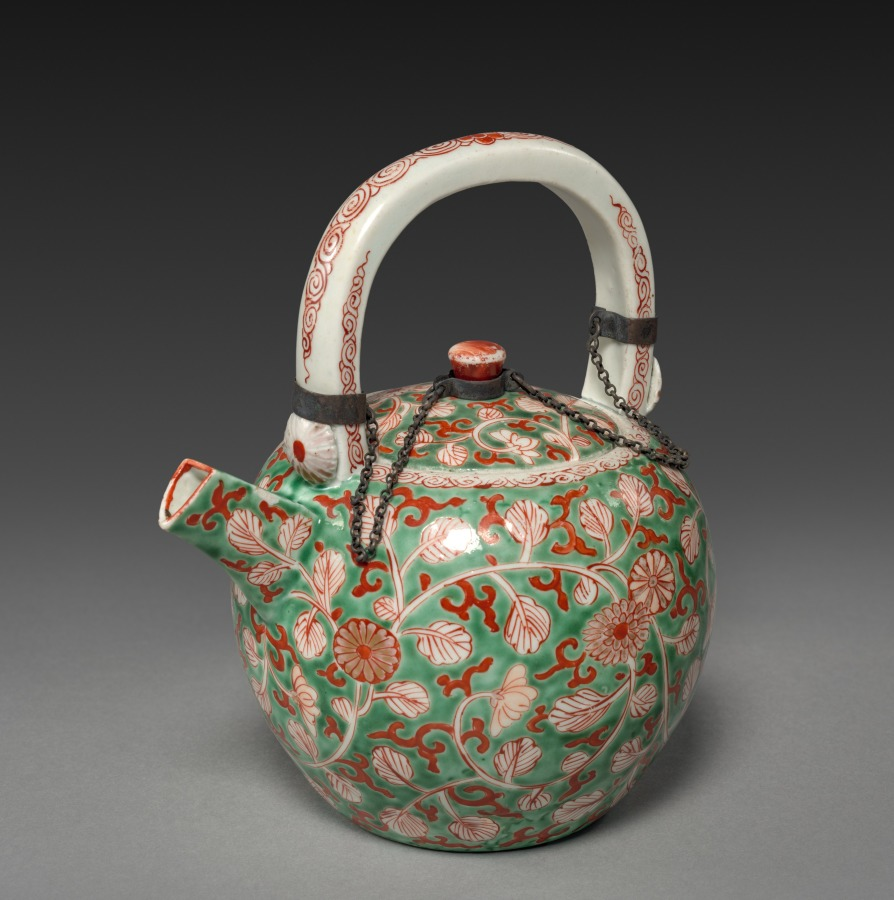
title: Wine Pot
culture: Japan, Edo period (1615–1868)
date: 1615–1868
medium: porcelain with colored enamel decoration (Hizen ware, Arita type)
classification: Ceramic